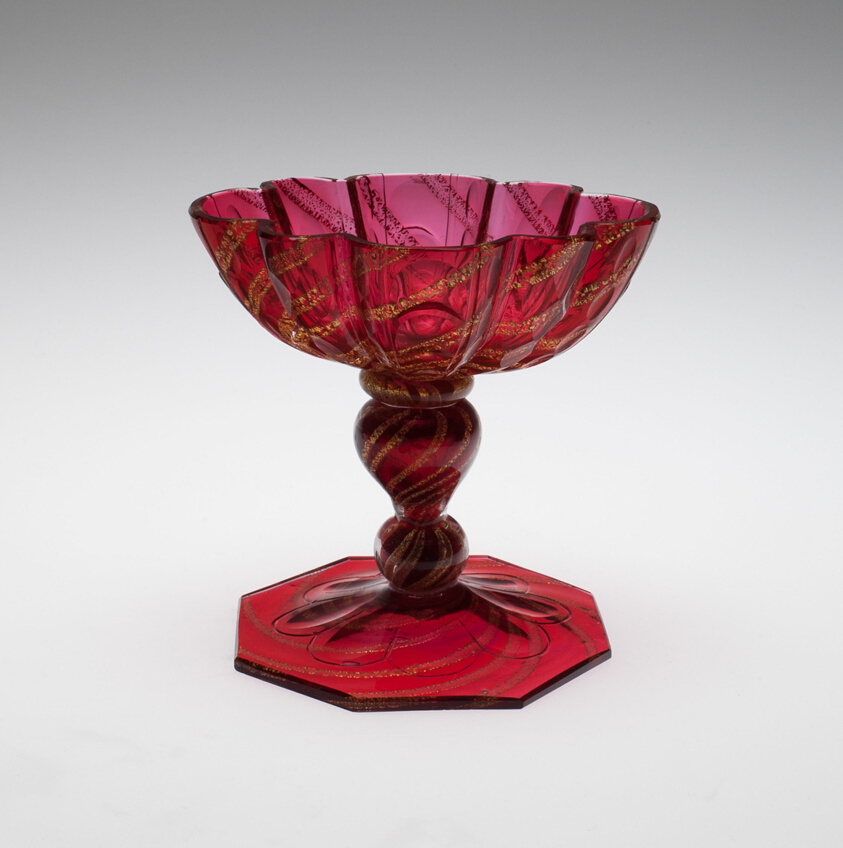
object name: Glass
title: Sweetmeat Dish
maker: Bohemia, Czech Republic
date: c. 1750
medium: Ruby glass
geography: Bohemia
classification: dish (vessel); glass; european decorative arts